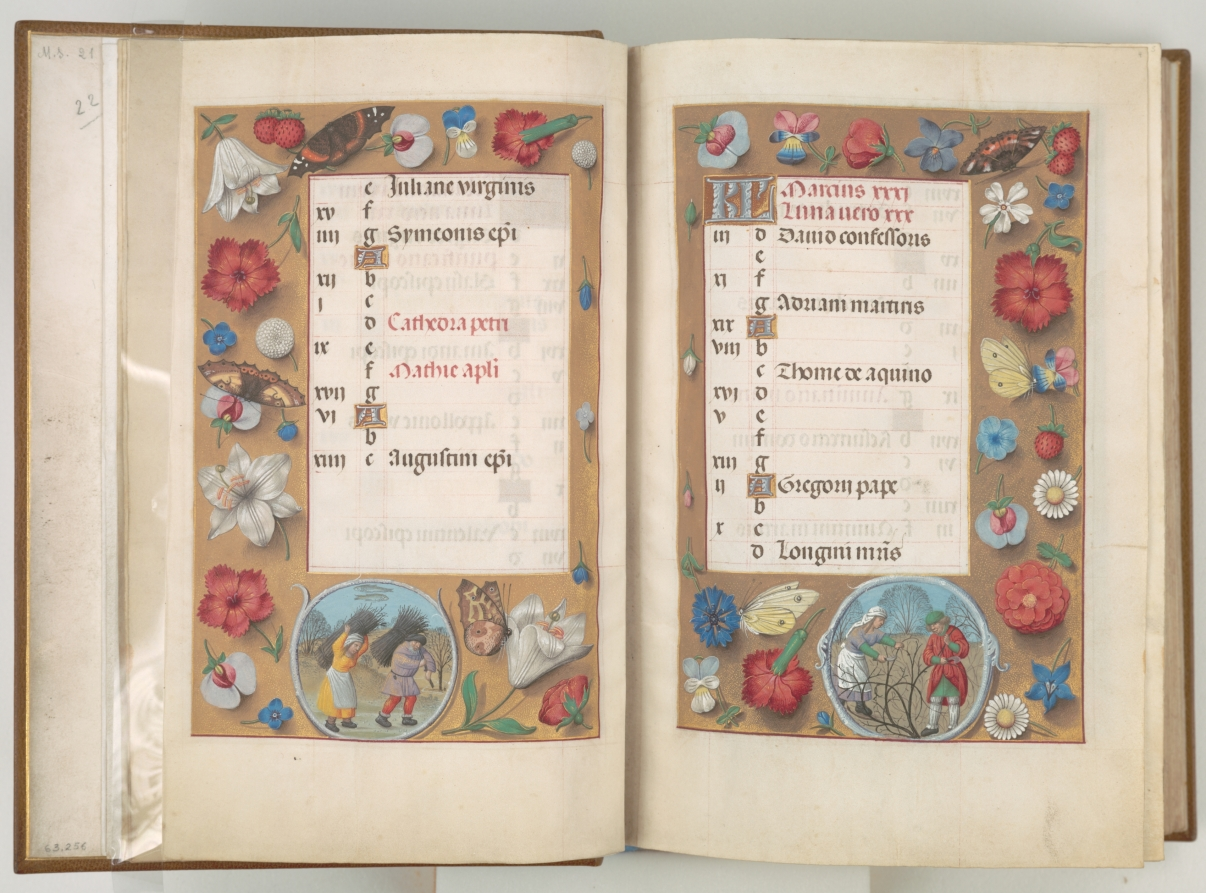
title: Hours of Queen Isabella the Catholic, Queen of Spain: Fol. 4r, March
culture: Flanders, Ghent and Bruges, late 15th century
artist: Master of the First Prayerbook of Maximillian (Flemish, c. 1444–1519)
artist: and Associates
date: c. 1500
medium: ink, tempera, and gold on vellum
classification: Bound Volume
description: This manuscript was illuminated by a circle of at least five highly organized manuscript painters active in the Flemish cities of Ghent and Bruges. The principal illuminator was Alexander Bening, who painted the majority of the book's miniatures. Manuscripts produced by this circle of artists are renowned for the decoration of their borders, which typically feature a rich variety of realistically painted flowers, birds, and butterflies. This prayer book, called a book of hours, was intended not for a cleric but for the private devotions of a lay person—in this case, Isabella the Catholic, Queen of Spain (1451–1504); her coat of arms embellishes the book's frontispiece. It is unlikely that the book was commissioned by the Queen herself; rather, she probably received it as a diplomatic gift from someone courting her patronage, perhaps Cardinal Francisco Jimenez de Cisneros. A Franciscan friar, Jimenez was dependent upon Isabella for his advancement, first to the post of Queen's confessor in 1492, and then to Archbishop of Toledo in 1495.